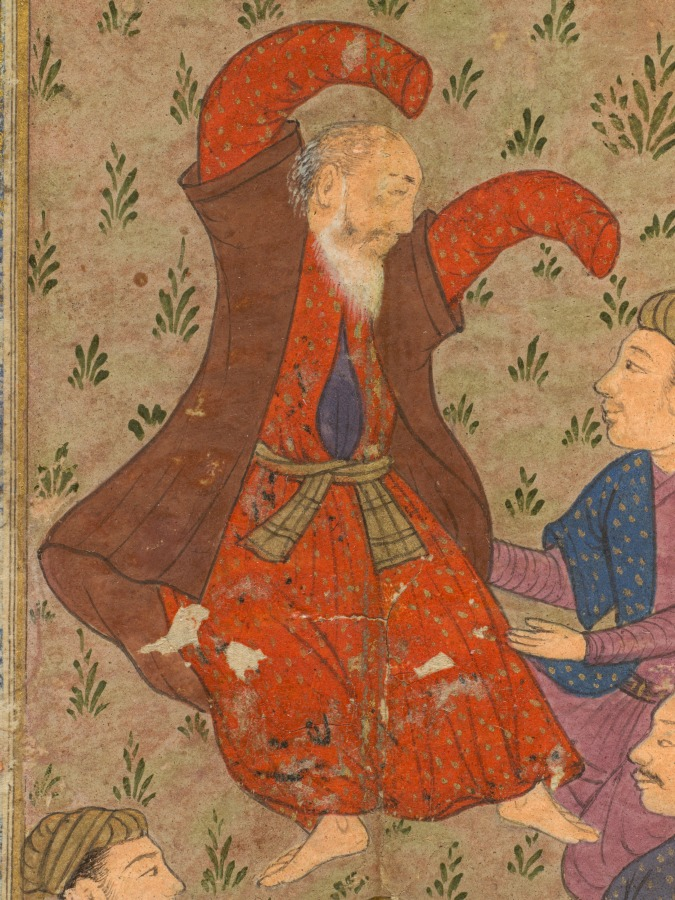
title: A dancing dervish and three musicians, from a Divan (Collected Poems) of Urfi (Persian, 1555–1591)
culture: India, Muhammadpur, Bijapur, Deccan, 17th century; made for Sultan Muhammad Adil Shah (r. 1627–56)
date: 1637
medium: Gum tempera and gold on paper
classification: Painting